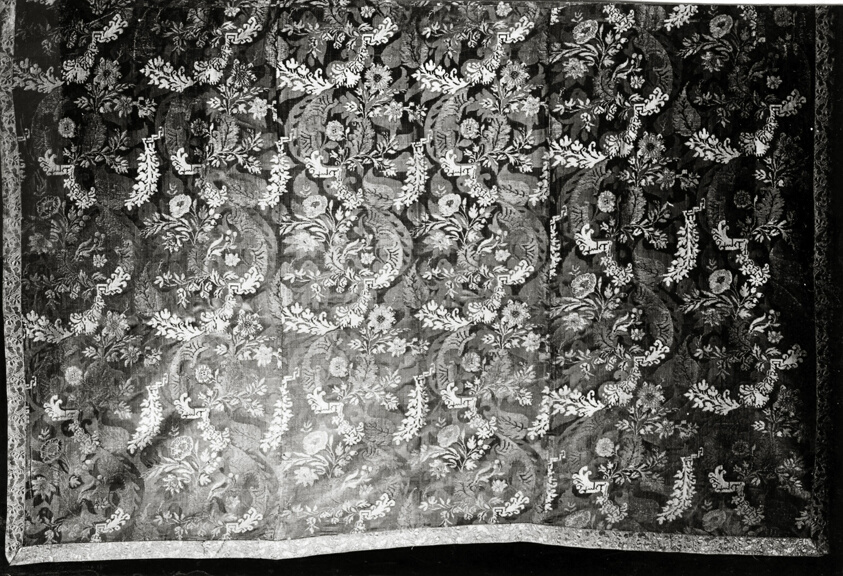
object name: Textile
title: Panel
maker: France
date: c. 1711/12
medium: Silk and gilt-metal-strip-wrapped silk, 4:1 satin weave with supplementary brocading wefts bound in twill interlacings and self-patterned by reversing of faces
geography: France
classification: textile; weaving